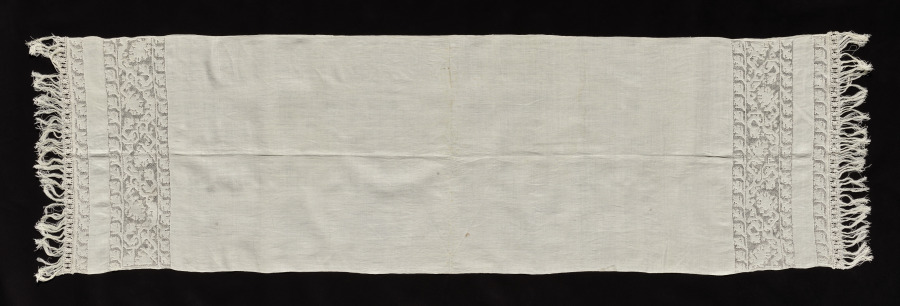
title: Scarf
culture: Italy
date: 1800s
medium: Linen: needle lace (drawnwork), macrame fringe at ends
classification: Lace